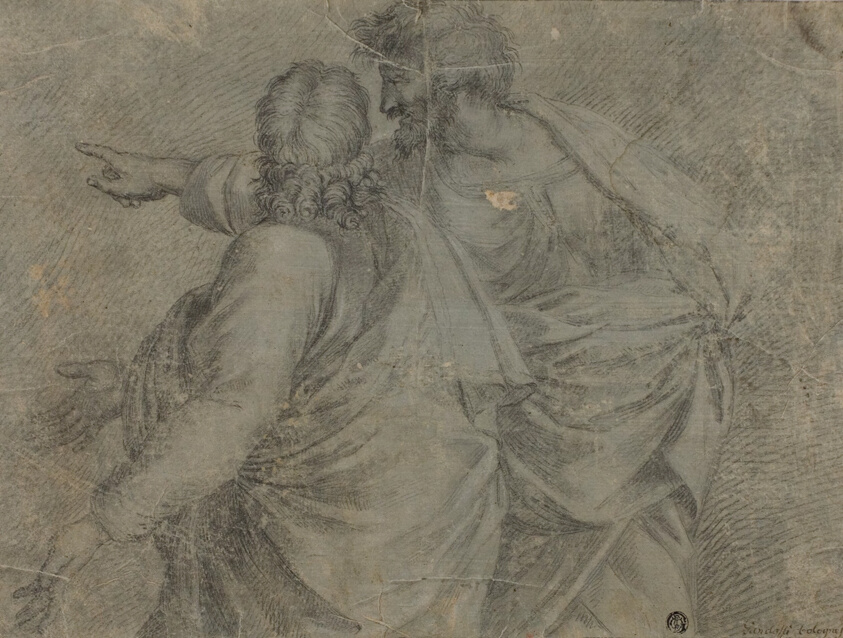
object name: Drawing and Watercolor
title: Two Men Conversing and Gesturing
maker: After Raffaello Sanzio, called Raphael; Italian, 1483-1520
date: 18th century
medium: Metalpoint and black chalk, with traces of white chalk, on pale blue-toned cream laid paper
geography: Italy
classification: chalk; drawings (visual works); prints and drawing